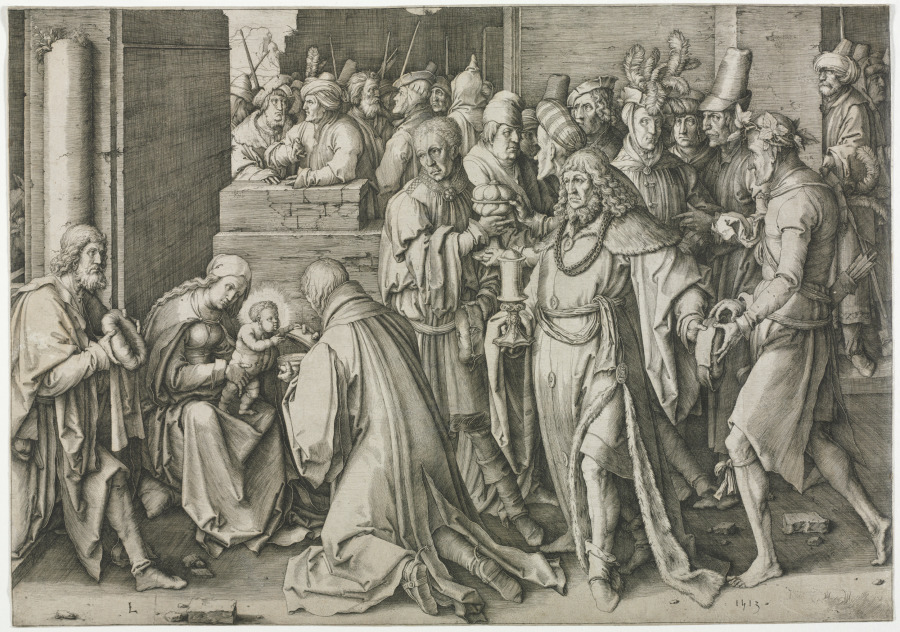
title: Adoration of the Magi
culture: Netherlands, 16th century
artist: Lucas van Leyden (Netherlandish, 1494–about 1533)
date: 1513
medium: engraving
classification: Print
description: While the arrival of the Magi in the Mirror of Holiness, CMA 2005.145.36.b, is a fairly quiet affair, here the kings enter the holy birthplace with great fanfare, accompanied by a large retinue. A wide variety of costumes, poses, figural types, and facial expressions enhance the theatricality and visual interest of the scene. Particularly luxurious are the costumes of the Magi and the priceless gifts they have brought. Amid the noise and splendor, the infant Jesus is distinguished by the brilliant light that emanates from his head.